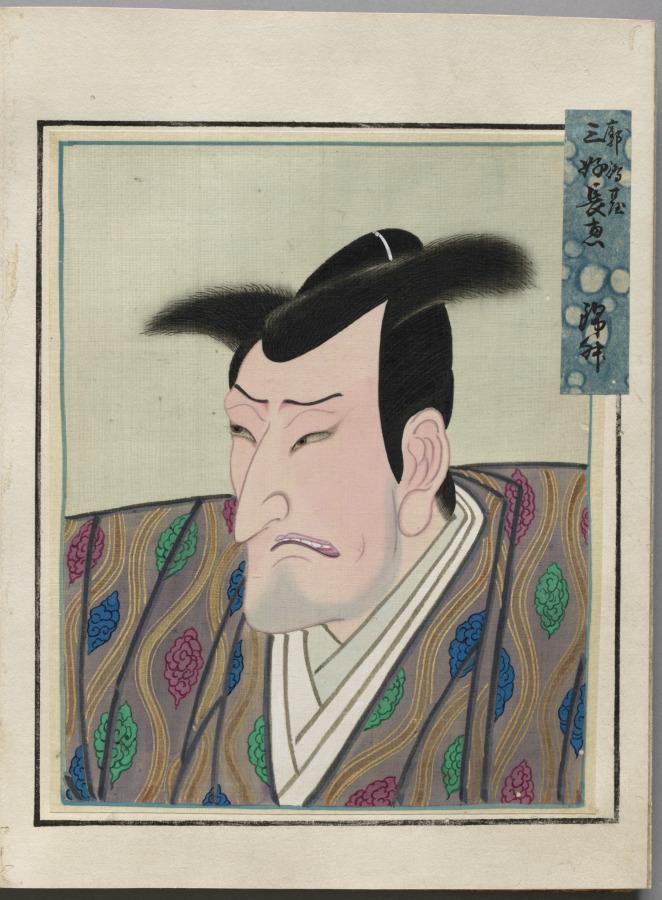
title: Double-Leaf from Album of Actor Portraits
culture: Japan, Edo period (1615–1868)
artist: Shōrakusai (Japanese)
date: c. 1790–1810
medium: double-leaf from an accordion-style album; ink and color on silk (right)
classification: Bound Volume